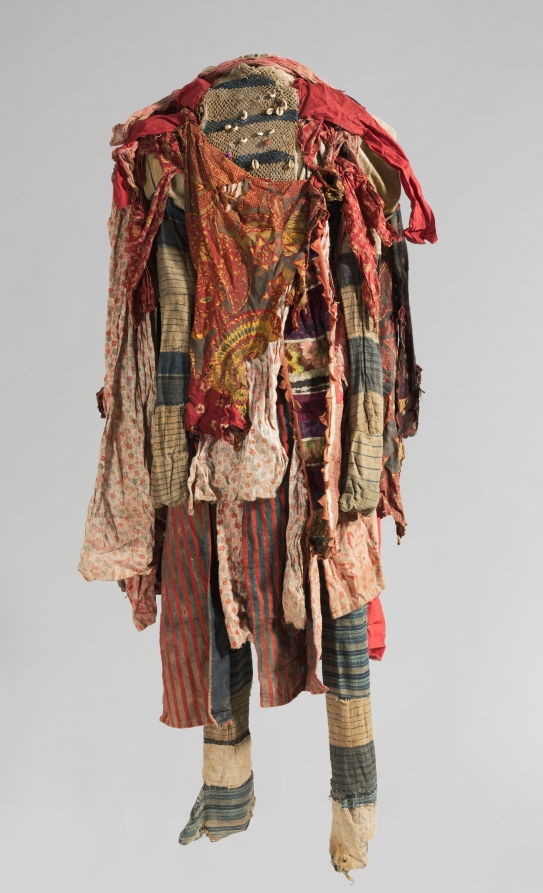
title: Egúngún Masquerade Dance Costume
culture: Africa, West Africa, Nigeria, Yorùbá-style maker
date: 1900s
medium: cotton, velvet, flannel, dye, faux fur, leather, cowrie shells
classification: Mask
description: Swirling into motion, egúngún masquerade costumes appear during annual festivities to bless the community. Manifesting ancestral spirits, they serve as a bridge between the living and the otherworld. The fabric panels create a dwelling place for ancestral spirits. Arranged and selected according to Yorùbá design sense (ojú-ọnà), this mask incorporates hundreds of African, Asian, and European fabrics. These include imported damasks, velvets, faux furs, and embroideries, as well as local indigo-dyed cottons.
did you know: The striped netting on the "face" of this masquerade costume allows the wearer to see out while keeping their identity concealed.